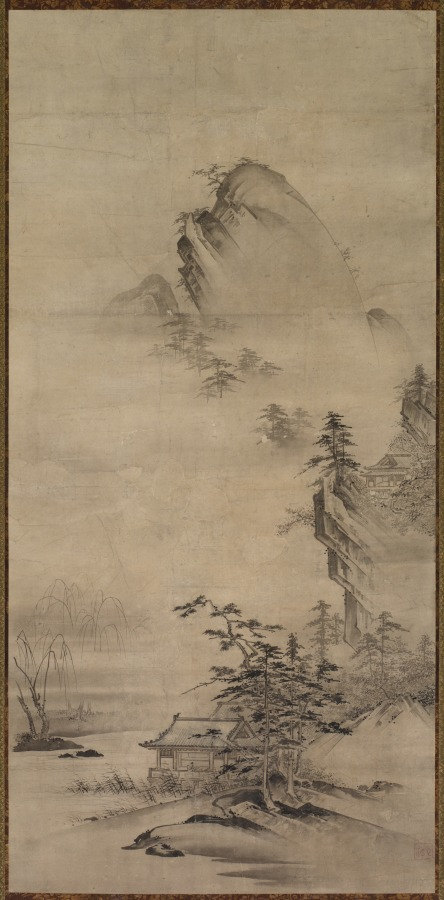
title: Landscape with a Pavilion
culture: Japan, Edo period (1615–1868)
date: c. 1700–1868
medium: hanging scroll; ink on paper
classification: Painting